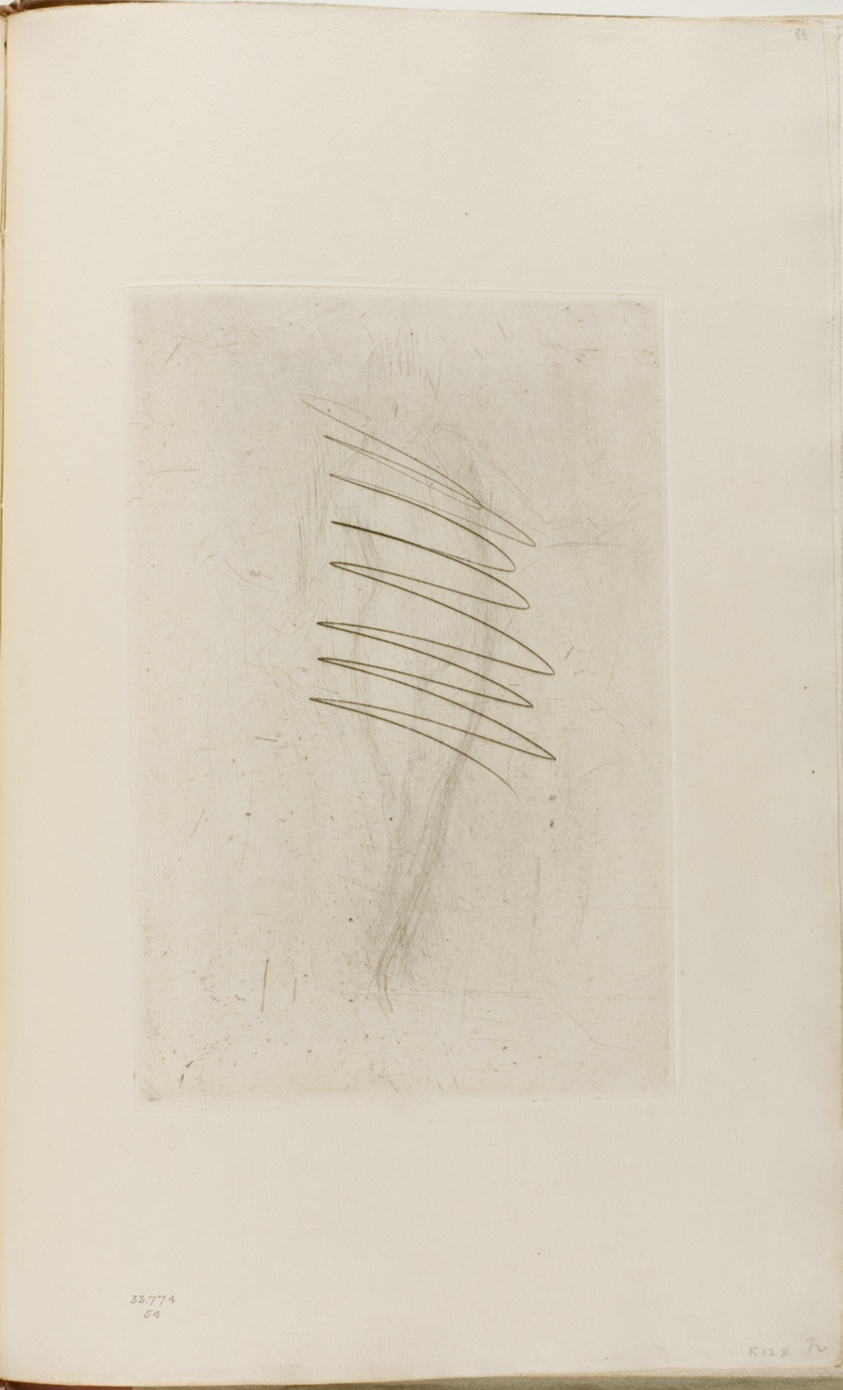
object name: Print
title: Nude Woman Standing, hand on hip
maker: James McNeill Whistler (American, 1834-1903)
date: 1873/78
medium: Drypoint with foul biting, with drypoint cancellation, in black ink on ivory laid paper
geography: United States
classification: drypoint; prints and drawing; book; foul biting; print; paper